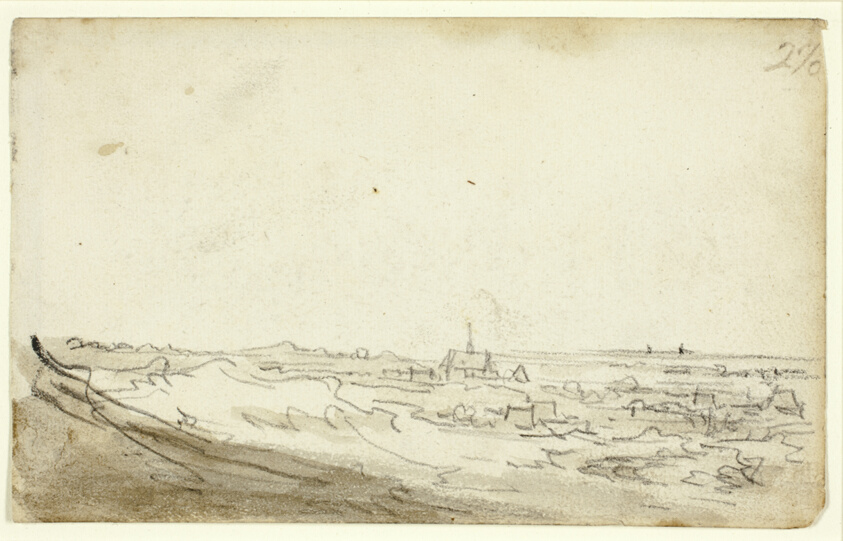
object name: Drawing and Watercolor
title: Panorama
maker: Jan van Goyen (Dutch, 1596-1656)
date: 1650–51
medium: Black chalk, with brush and brown wash, on ivory laid paper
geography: Netherlands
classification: chalk; drawings (visual works); prints and drawing